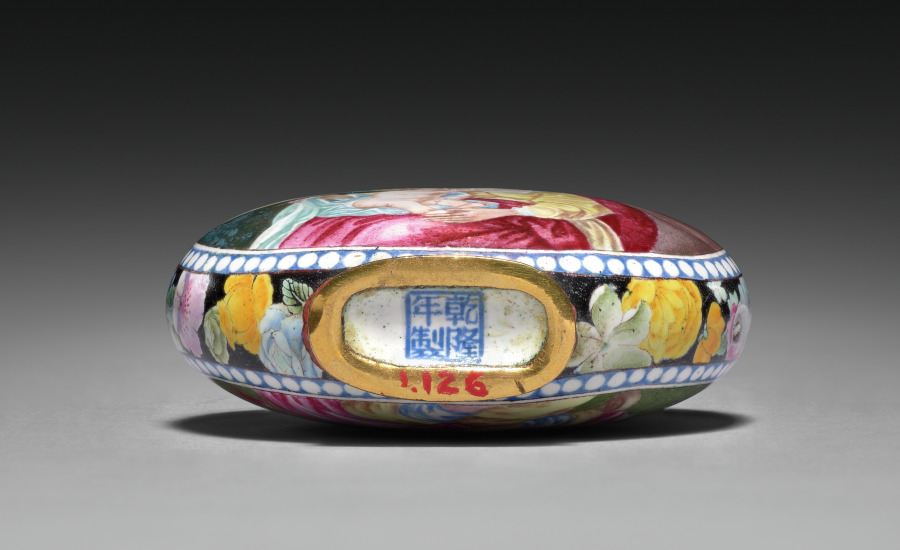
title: Snuff Bottle with European Figures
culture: China, Qing dynasty (1644-1911), Qianlong mark and reign (1736-95)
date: 1736–95 or later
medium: painted enamel on copper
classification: Enamel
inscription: 乾隆年製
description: Snuff bottles were introduced from Europe to China around the 1700s to hold portable snuff or medicine.